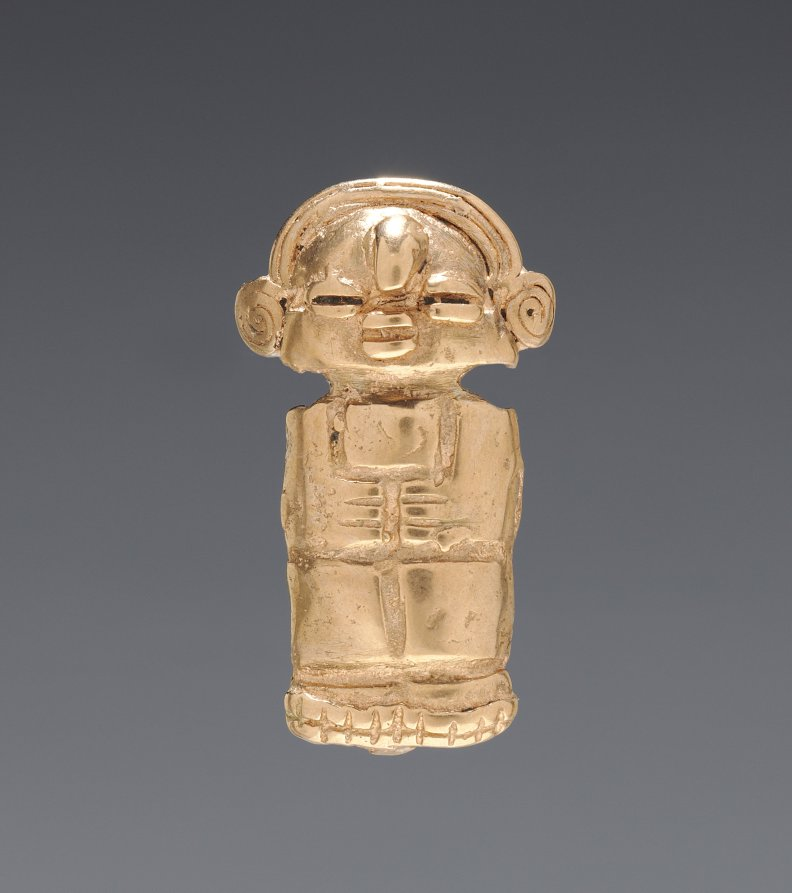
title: Necklace Figurine Bead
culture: Colombia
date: 1–700 CE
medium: cast gold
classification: Jewelry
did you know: Working with gold dates back to at least 500 BC in Ecuador and Colombia.